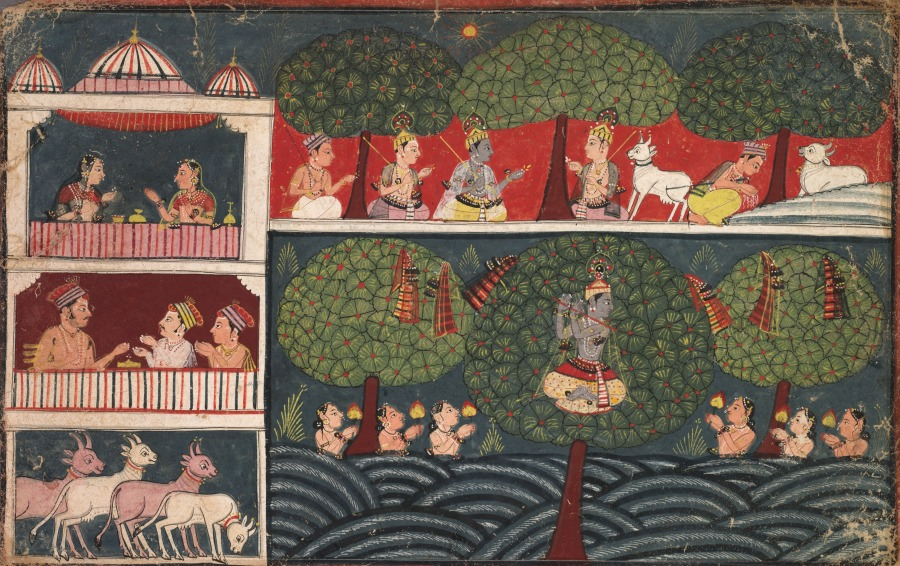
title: Krishna Steals the Clothes of the Milkmaids and Expounds on the Virtue of Trees, from a Braj Bhagavata Purana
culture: Central India, Madhya Pradesh, Malwa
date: c. 1650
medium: Gum tempera on paper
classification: Painting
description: When the milkmaids went to the Yamuna River to bathe, Krishna stealthily took their clothes and hid them in the treetops. Here, the blue-skinned Krishna sits in a tree playing his flute, waiting for the women to come to him. True devotees must shed all worldly inhibitions and approach their god with nothing to hide. The narrow register above shows Krishna expounding on the virtue of trees to the other cowherds. The illustration closely follows the extensive text, written on the back in the vernacular language of Braj, even down to the detail of how they drank the sweet water of the Yamuna River.